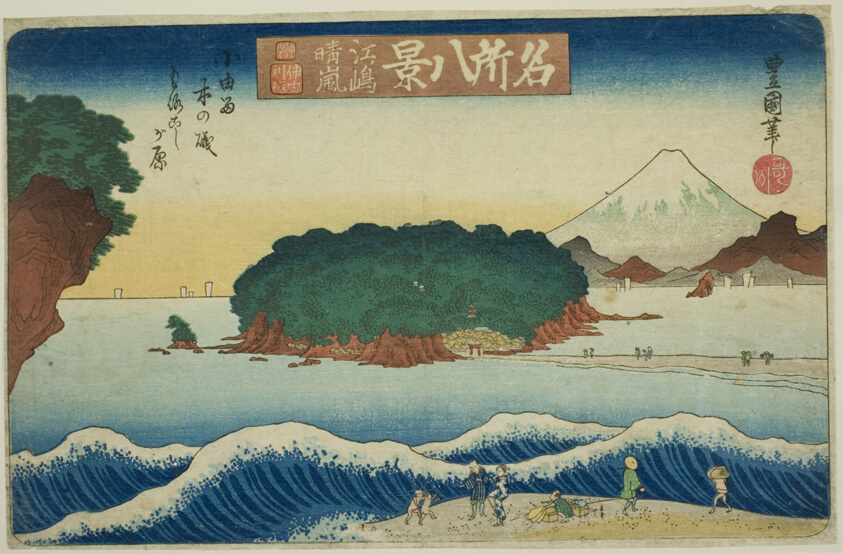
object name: Print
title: Clearing Weather at Enoshima, Morokoshigahara off the Shore of Koyurugi (Enoshima seiran, Koyurugi no iso Morokoshigahara), from the series "Eight Views of Famous Places (Meisho hakkei)"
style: Japanese (culture or style)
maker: Utagawa Toyoshige (Toyokuni II) (Japanese, 1777-1835)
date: c. 1833/34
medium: Color woodblock print; oban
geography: Japan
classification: woodblock print; print; asian art